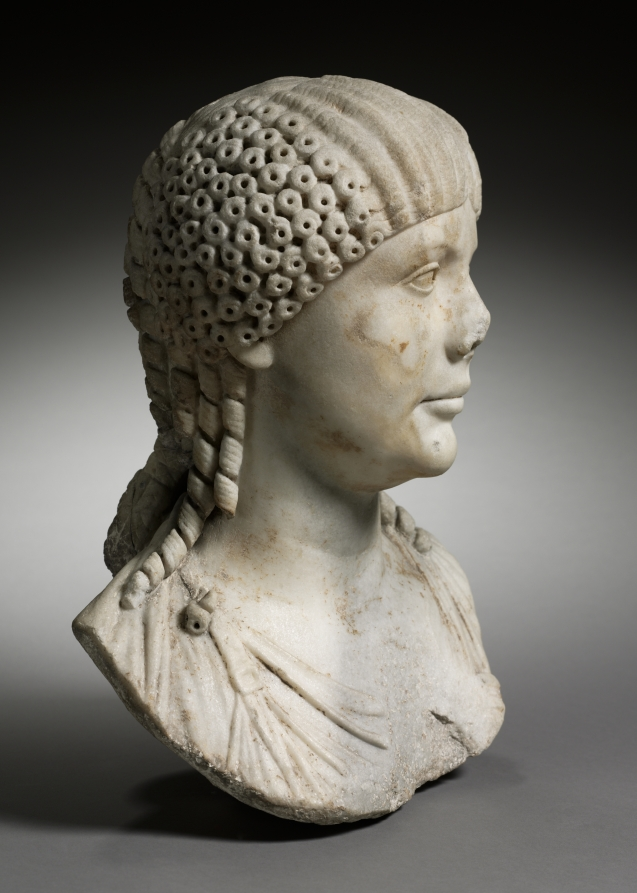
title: Portrait Bust of the Empress Claudia Octavia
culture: Italy, Roman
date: 50–70 CE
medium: marble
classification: Sculpture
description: This portrait bust depicts a young woman whose idealized features and elaborate hairstyle may identify her as the empress Claudia Octavia (r. AD 54-62), unfortunate first wife of the notorious emperor Nero. Over her tunic she wears a stola, a long garment hanging from both shoulders and distinguishing her as a married, upper-class woman. Although beloved by the Roman citizenry and described by the historian Tacitus as “aristocratic and virtuous,” Octavia was eventually divorced and banished by Nero, then ordered put to death.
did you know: The complex coiffure includes four elements: parted waves (top), tight curls (sides), hanging ringlets (shoulders, back), and a braided knot (back).